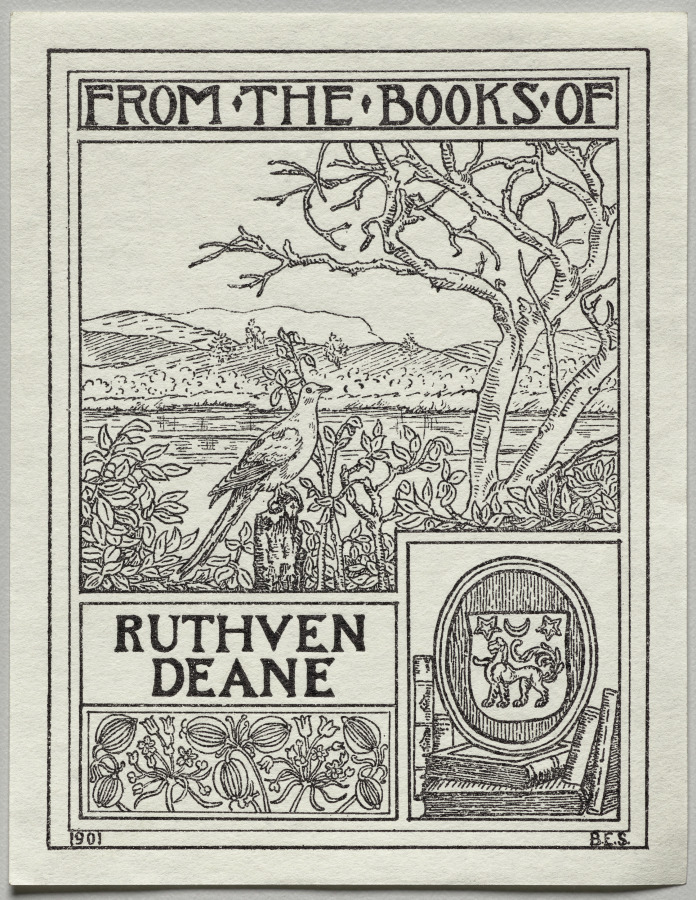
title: Bookplate: Ruthven Deane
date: 1901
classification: Print